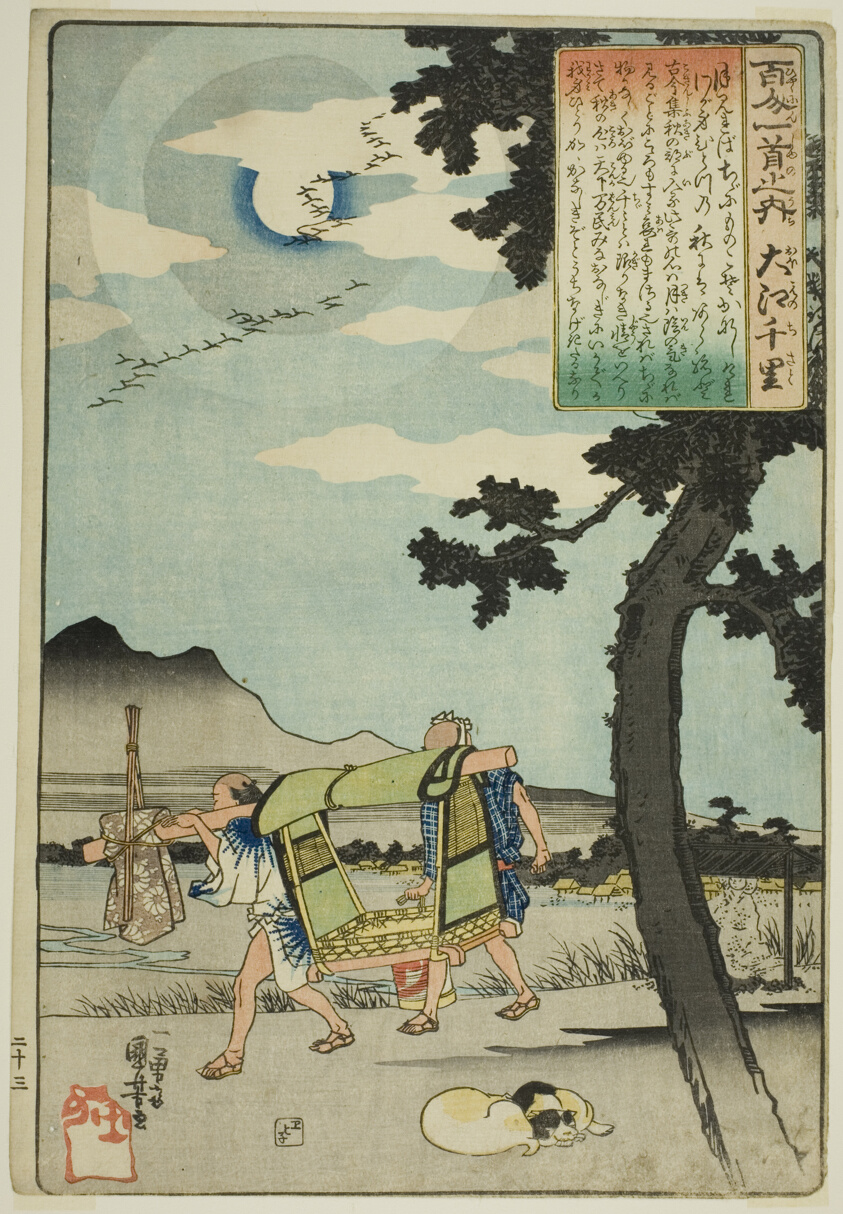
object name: Print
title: Oe no Chisato, from the series "One Hundred Poems by One Hundred Poets (Hyakunin isshu no uchi)"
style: Japanese (culture or style)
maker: Utagawa Kuniyoshi (Japanese, 1797-1861)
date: c. 1842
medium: Color woodblock print; oban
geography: Japan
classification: woodblock print; print; asian art